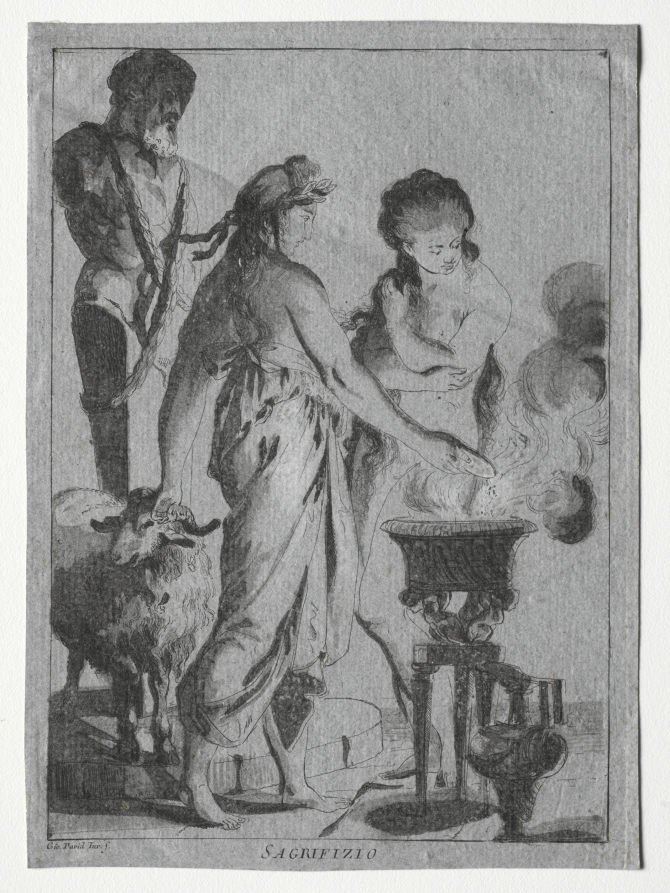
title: Sacrifice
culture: Italy, 18th century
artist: Giovanni David (Italian, 1743–1790)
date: c. 1775–1776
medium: etching and aquatint printed in black and brown, heightened with white gouache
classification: Print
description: David was the most intriguing Genoese print-maker of the 18th century. Like Francisco Goya, his Spanish contemporary, he was a very early practitioner of aquatint, a technique invented in France about 1765. David's free, painterly handling of this type of etching medium, which produces the effect of a wash, created subtle effects of light and atmosphere.